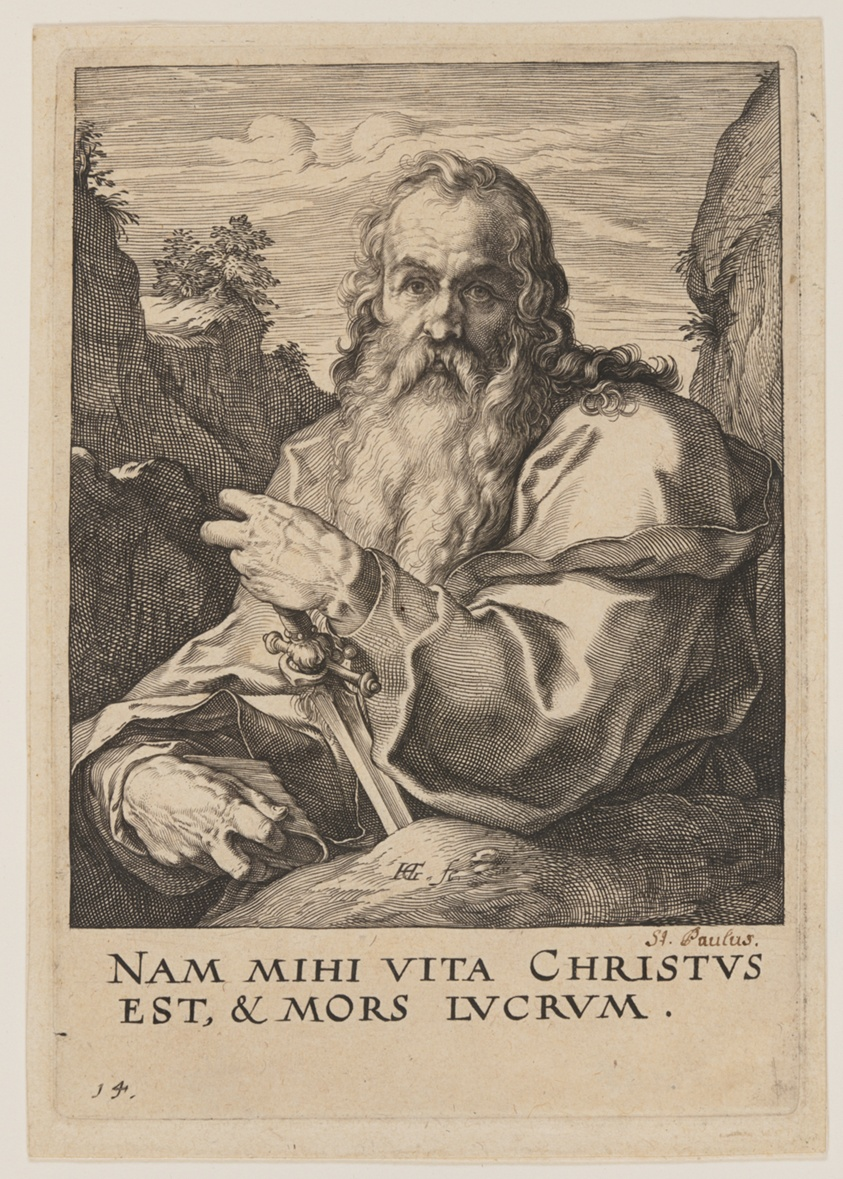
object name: Print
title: St Paul, from Christ, the Apostles and St Paul with the Creed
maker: Hendrick Goltzius (Dutch, 1558–1617)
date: 1589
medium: Engraving on ivory laid paper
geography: Netherlands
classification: engraving; paper; print; prints and drawing